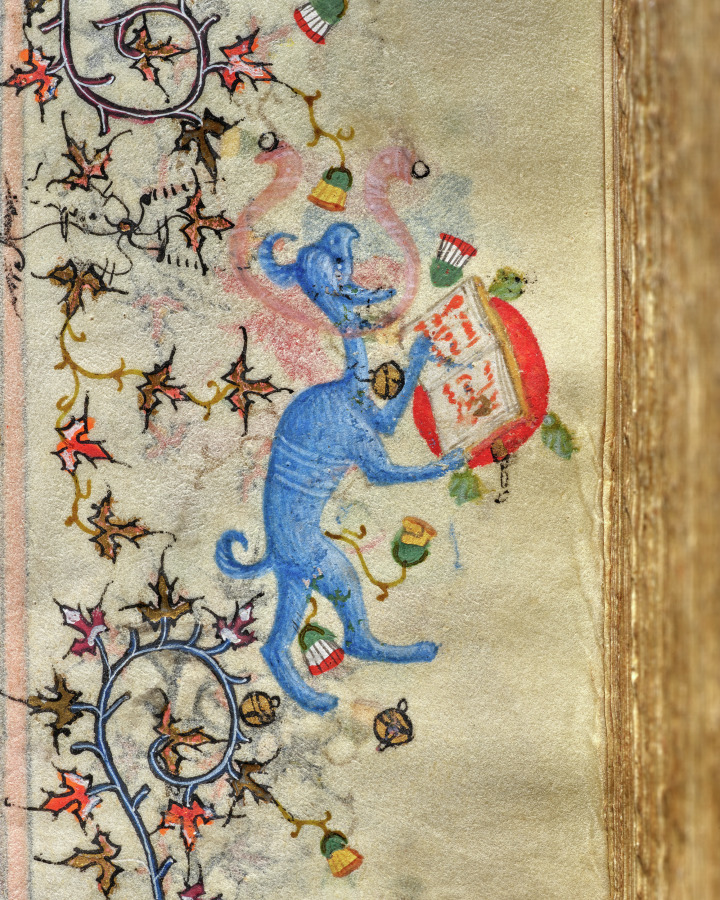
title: Hours of Charles the Noble, King of Navarre (1361-1425): fol. 41r, Text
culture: France, Paris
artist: Master of the Brussels Initials and Associates (French)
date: c. 1405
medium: ink, tempera, and gold on vellum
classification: Bound Volume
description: This precious book was highly prized by its owner, Charles III, King of Navarre, a French-born prince whose coat of arms is painted on 20 folios. Charles visited Paris on numerous occasions and likely acquired this volume there in 1404. Paris was the center of the European book trade at the time and attracted illuminators from many parts of Europe. This manuscript represents one of the most remarkable fusions of French and Italian taste in book illumination. Though conforming to Parisian standards, most of the book’s major miniatures are the work of the Brussels Initials Master, an Italian illuminator who previously worked in Bologna and Padua.